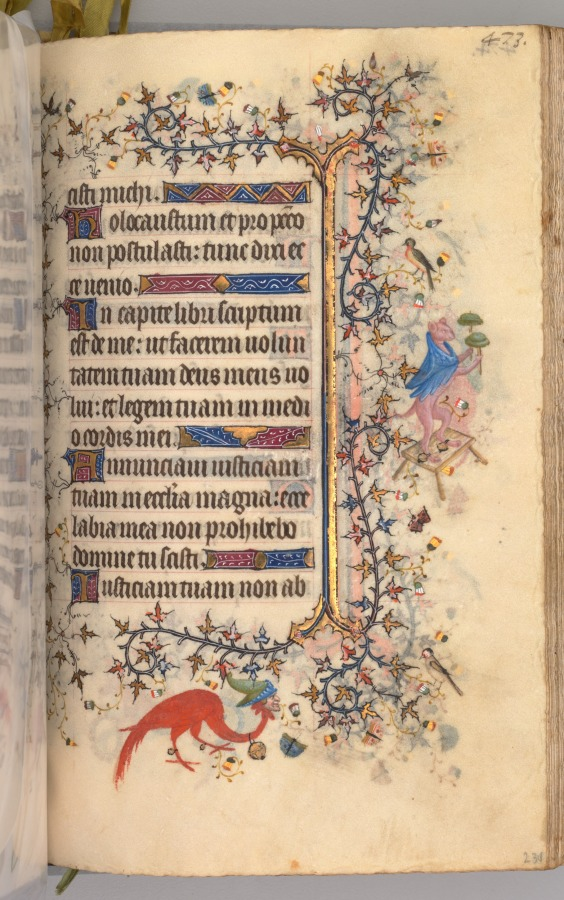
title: Hours of Charles the Noble, King of Navarre (1361-1425): fol. 231r, Text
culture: France, Paris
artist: Master of the Brussels Initials and Associates (French)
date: c. 1405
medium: ink, tempera, and gold on vellum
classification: Bound Volume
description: This precious volume was obviously highly prized by its owner, the French-born King of Navarre, who had his coat of arms painted on no less than twenty folios. Rather than directly commissioning this manuscript from a specific workshop, it seems that Charles the Noble acquired his book of hours -- perhaps ready-made for the luxury market -- while on a trip to Paris in 1404-05. A collaborative effort, six painting styles are evidenced within the pages of this codex, those of two Italians, two Frenchmen, and two Netherlanders. The painter who was responsible for the planning and decoration of the book, and who produced seventeen of the large miniatures, was a Bolognese artist known as the Master of the Brussels Initials. His principal assistant, responsible for most of the borders, was a Florentine who signed his name "Zecho" da Firenze on folio 208 verso.